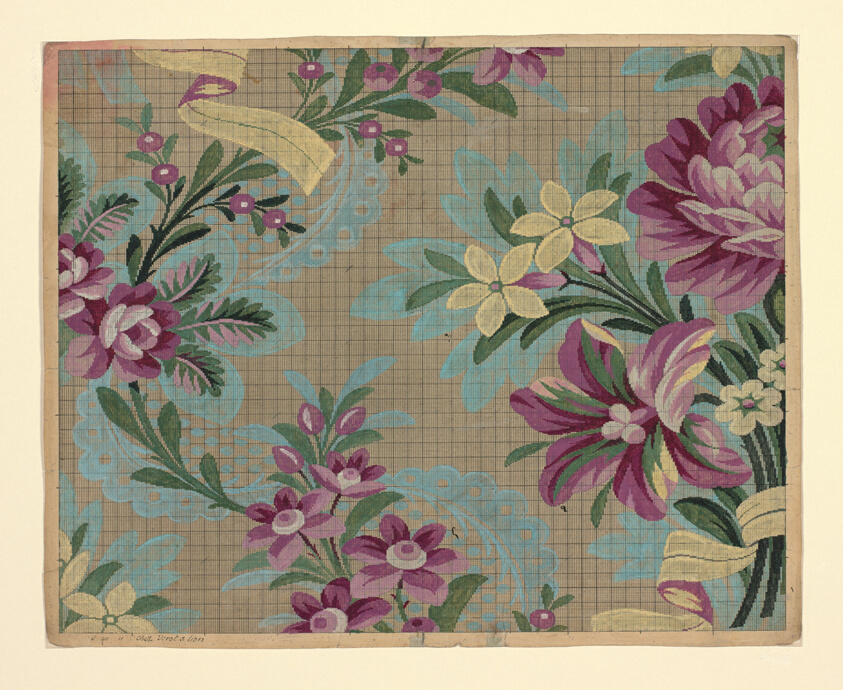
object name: Drawing and Watercolor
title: Mise-en-carte (Point-paper)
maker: Designed by Germain Frères; France, Lyon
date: 1760/90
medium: Ink and gouache on hand drawn graph paper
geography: France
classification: textile; accessory - paper design